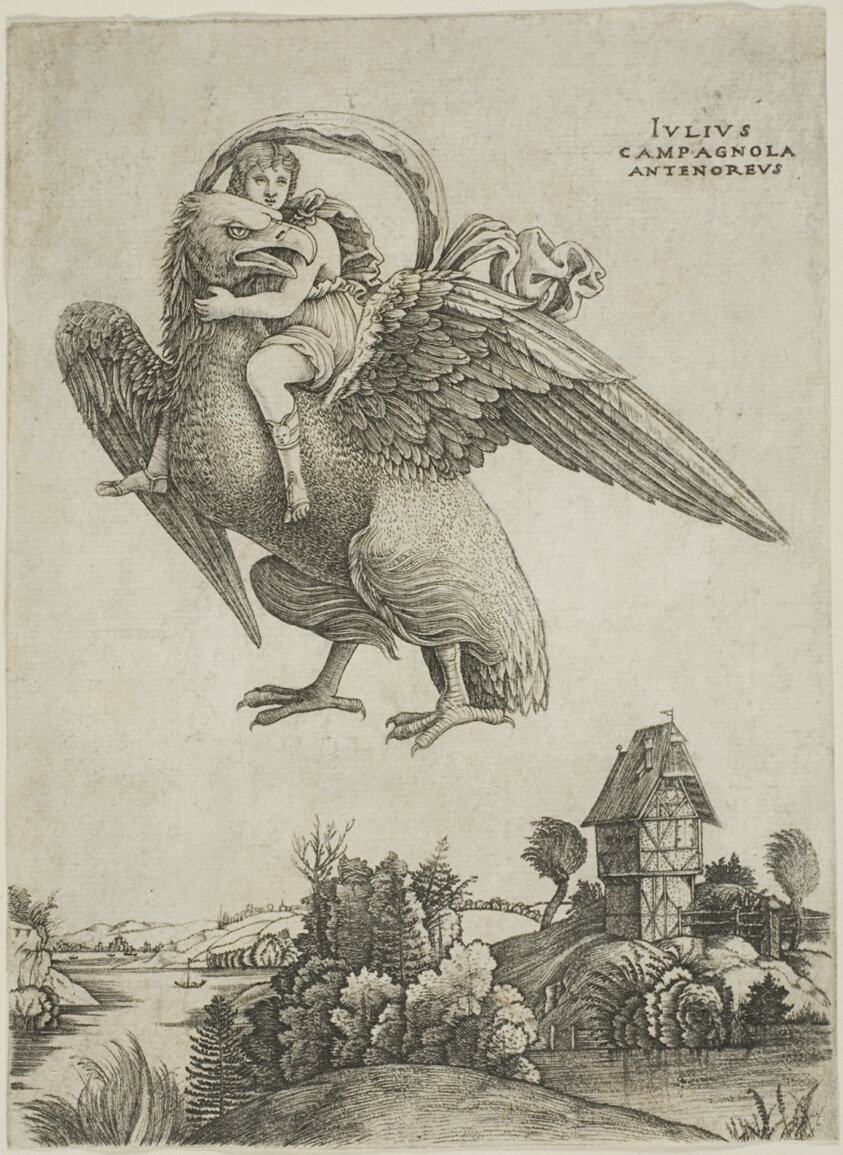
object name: Print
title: Ganymede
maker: Giulio Campagnola (Italian, c. 1482-1515/18)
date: 1500/03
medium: Engraving on ivory laid paper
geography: Italy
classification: engraving; print; prints and drawing